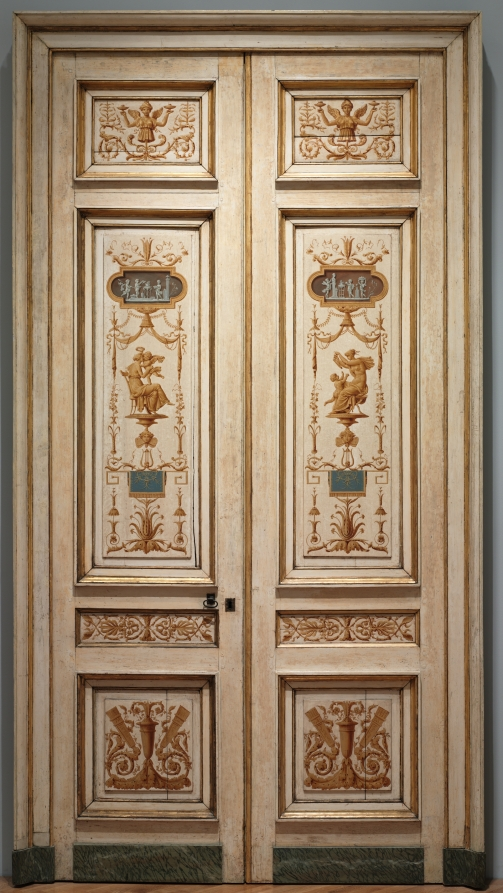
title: Double-Leaf Doors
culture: France, 18th century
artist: Pierre Rousseau (French, 1751–1829)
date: 1790s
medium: oil on wood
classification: Painting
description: Shifts in style and taste often result in changes to original architectural details. Rousseau painted these doors with imitation dark wood grain. Another craftsman later scraped off the dark color surrounding the classical designs. This set has recently been conserved.